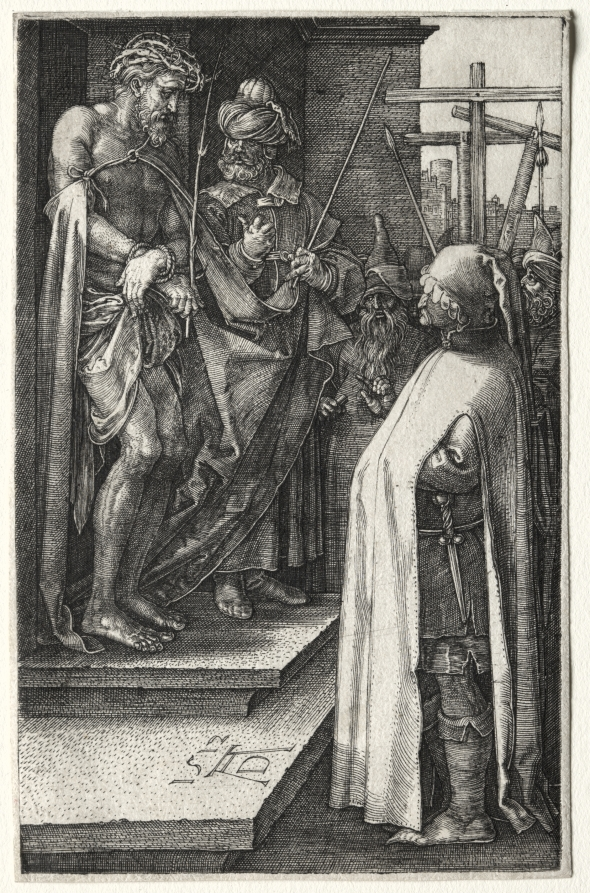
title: Christ Shown to the People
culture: Germany, late 15th-early 16th Century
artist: Albrecht Dürer (German, 1471–1528)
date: 1512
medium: engraving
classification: Print